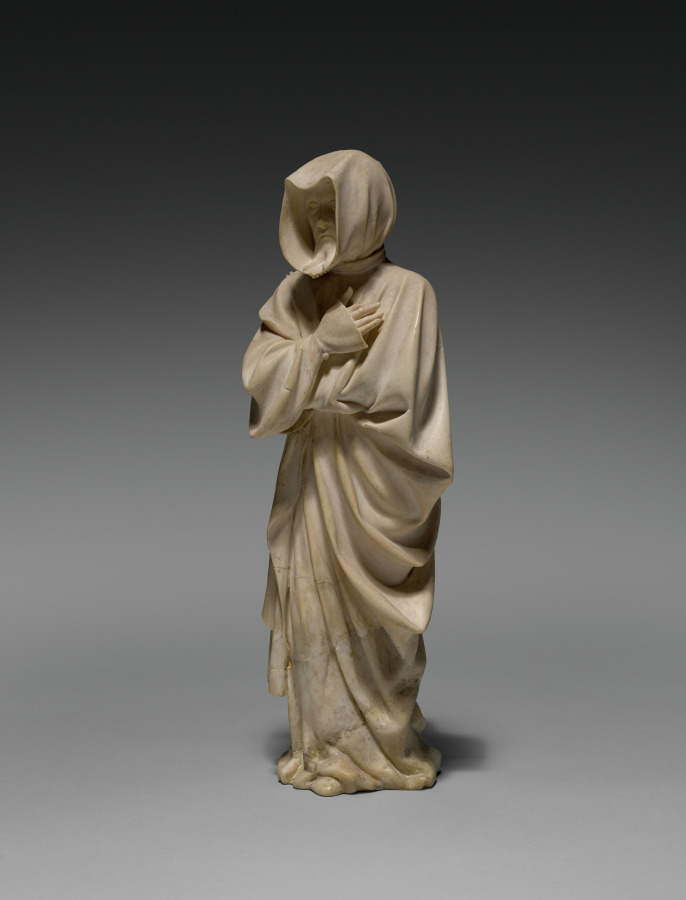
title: Mourner from the Tomb of Philip the Bold, Duke of Burgundy (1364–1404)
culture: Netherlands, active Dijon, 15th century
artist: Claus de Werve (Netherlandish, 1380–1439)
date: 1404–10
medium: vizille alabaster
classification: Sculpture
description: This figure comes from the tomb of Duke Philip the Bold from the church of Champmol near Dijon (Burgundy, France). Philip, who founded the monastery and designated it as his burial place, hired the best artists, many of whom came from the Netherlands. While the commission was given in 1381, the work was not completed until 1410, six years after the duke’s death. This mourner is unusual for the time because it is not carved as a static low relief on the pedestal of the tomb but interacts with the viewers and their fellow procession members. The lifelike quality of the figure is due in large part to the alabaster. Its softness allowed artists to carve details into the material, and the transparent, milky white stone could also be polished to a high gloss.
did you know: A plaster cast of this mourner decorates the empty niche in the Tomb of Philip the Bold in Dijon, France.